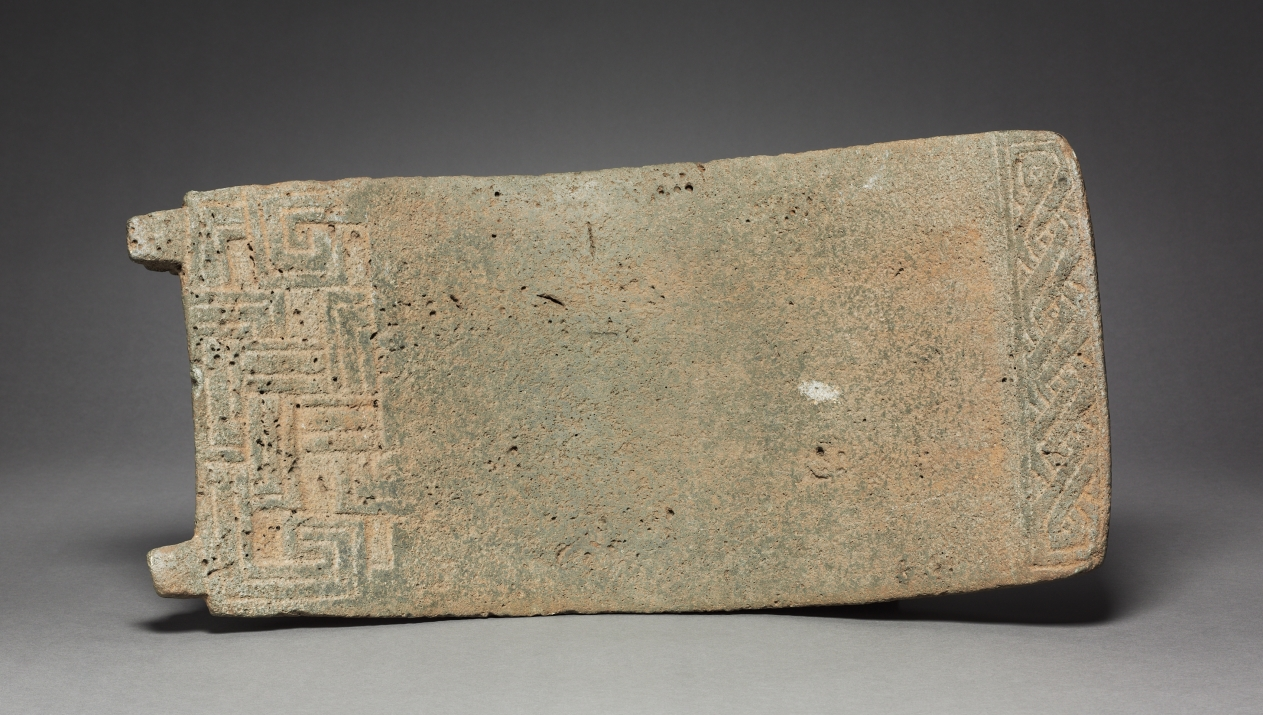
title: Metate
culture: Costa Rica, Guanacaste, northwest coast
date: 1200–1500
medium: gray volcanic stone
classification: Sculpture